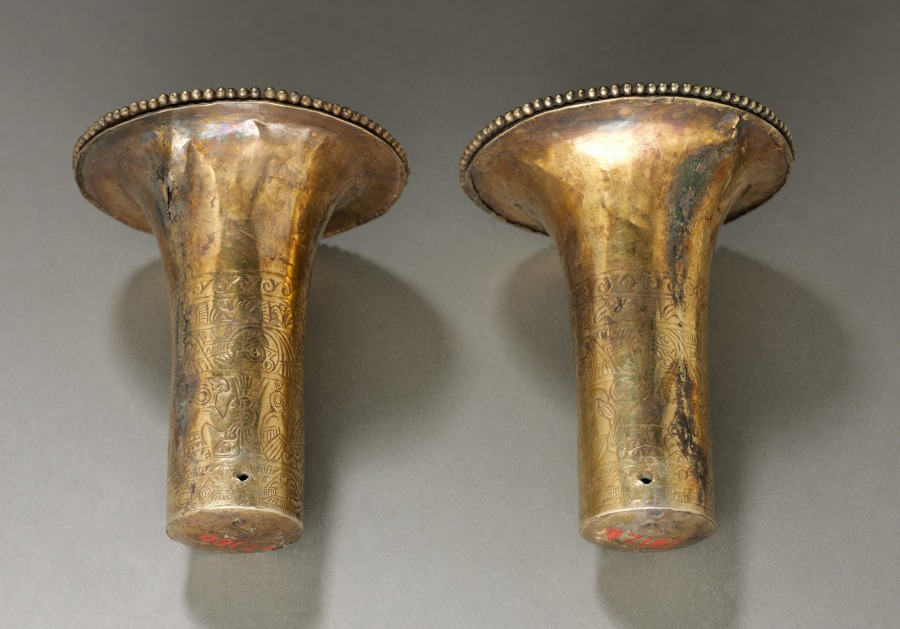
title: Pair of Ear Flares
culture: Peru, North Coast, Chimú style (900-1470)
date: 900–1470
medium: hammered gold alloy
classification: Metalwork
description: North Coast ear ornaments typically have a long shaft that balanced the weight of the glorious frontal. This pair illustrates Chimú interest in the sea, which had great economic and religious importance. On the shafts are bands of seabirds and waves, and a similar pattern edges the frontals, which were altered in modern times. Originally solid disks, the frontals' centers were cut out and a dotted band was added to the rim.